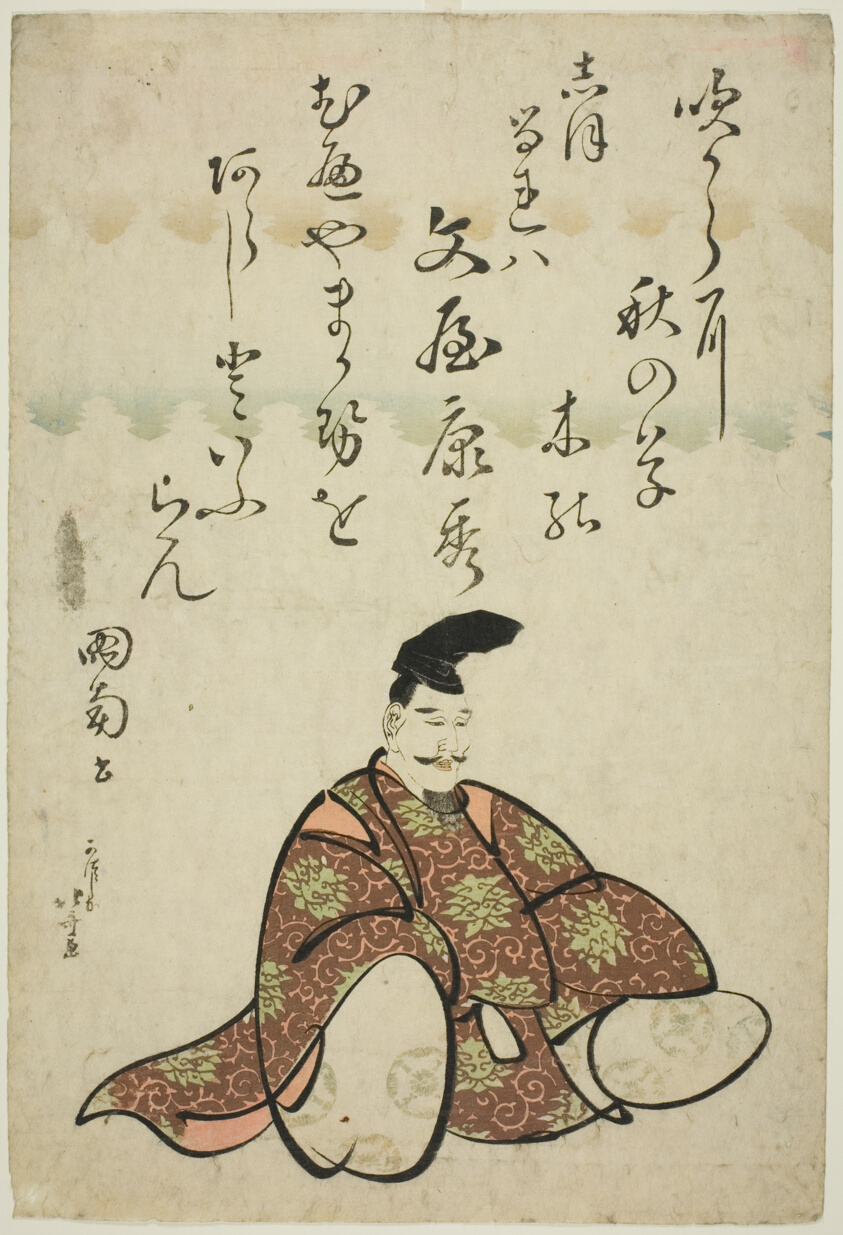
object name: Print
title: The Poet Bunya no Yasuhide, from the series Six Immortal Poets (Rokkasen)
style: Japanese (culture or style)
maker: Katsushika Hokusai 葛飾 北斎; Japanese, 1760-1849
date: c. 1810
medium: Color woodblock print; oban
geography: Japan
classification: woodblock print; print; asian art